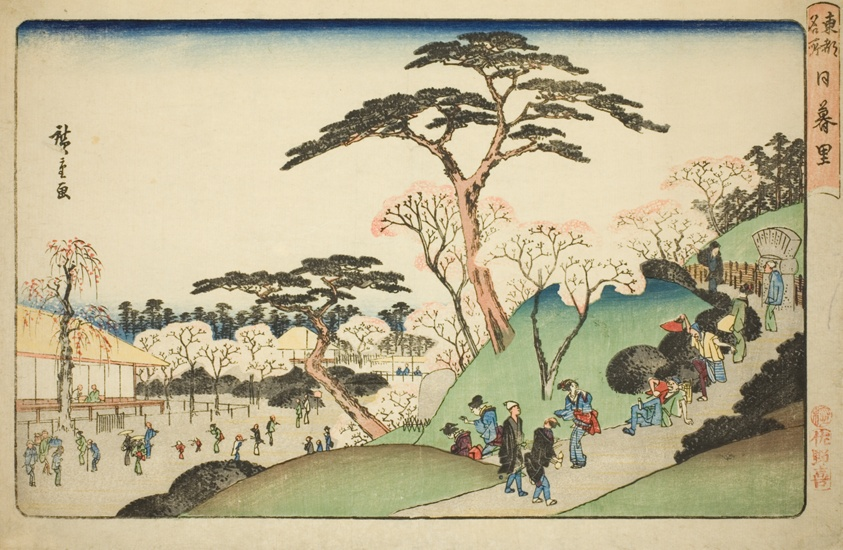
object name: Print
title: Nippori, from the series "Famous Places in the Eastern Capital (Toto meisho)"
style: Japanese (culture or style)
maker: Utagawa Hiroshige 歌川 広重; Japanese, 1797-1858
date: c. 1835/38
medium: Color woodblock print; oban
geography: Japan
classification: print; asian art